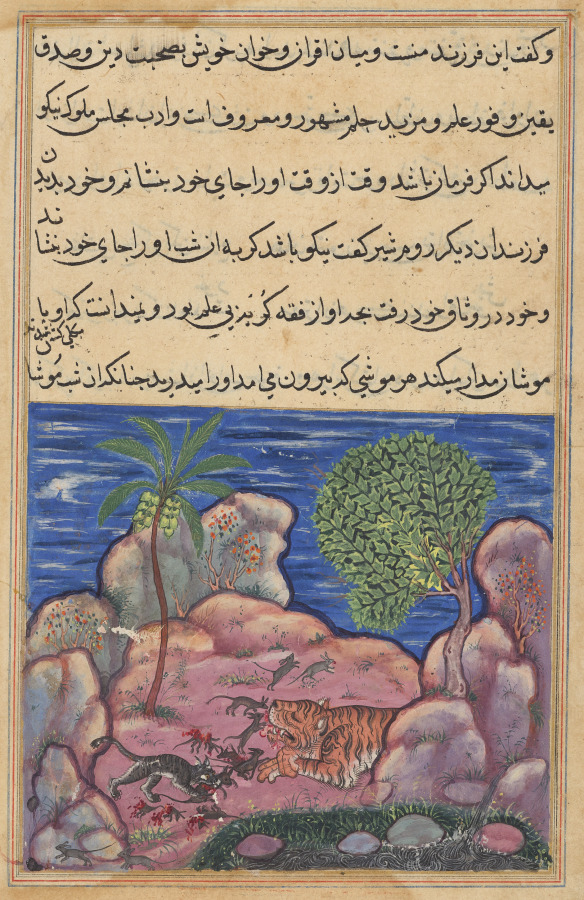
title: The cat attacks the mice which disturb the lion, from a Tuti-nama (Tales of a Parrot): Fifteenth Night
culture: India, Mughal court, 16th century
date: c. 1560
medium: gum tempera, ink, and gold on paper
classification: Painting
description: One day came when the cat brought one of his sons to substitute for him as guardian against the mice, so that he could have some time away to visit his other children. That night the young cat killed all of the mice, as shown in this painting, after which the lion had no need for a cat anymore and relieved him of his position as Magistrate of the Court. The text reads: "The cat said to his son, ‘The spark of this calamity was set by you, and the robe of this disaster was tailored by you. If you had not annihilated the mice and had not entirely relieved the lion’s heart of his grief, he would not have dismissed me.’ The young cat was filled with remorse for having killed the mice." By the time the parrot finished telling the story, daybreak came and it was too late for Khujasta to rendezvous with her lover under the cover of darkness.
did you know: The same anonymous artist completed all three pages in the story of the lion and the mice.